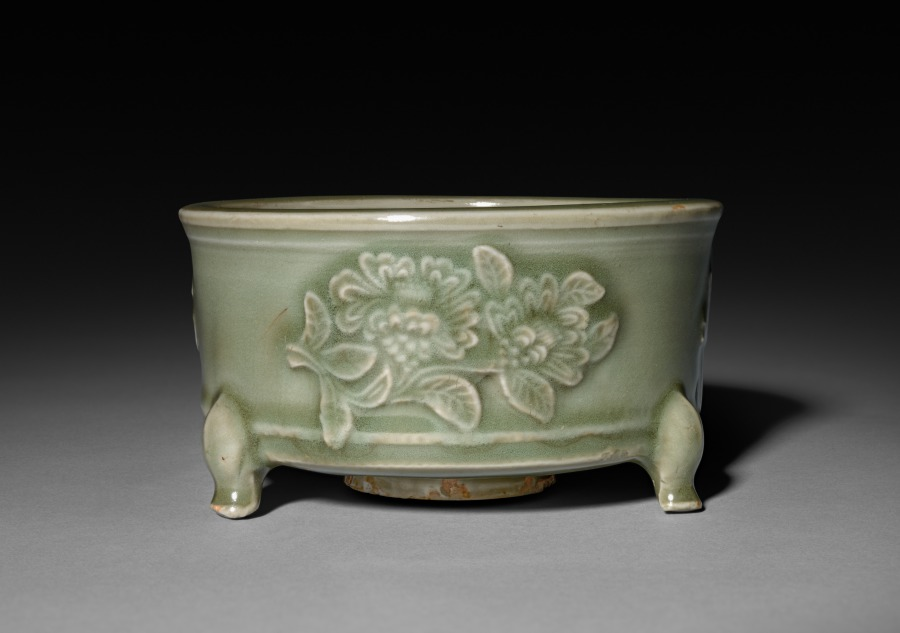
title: Incense Burner in Form of Archaic Lian with Peonies in Relief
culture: China, Zhejiang province, Yuan dynasty (1271-1368)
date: 1300s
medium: Glazed porcelain with molded decoration, Longquan ware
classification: Ceramic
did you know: In East Asian art, peonies traditionally symbolize prosperity and wealth.